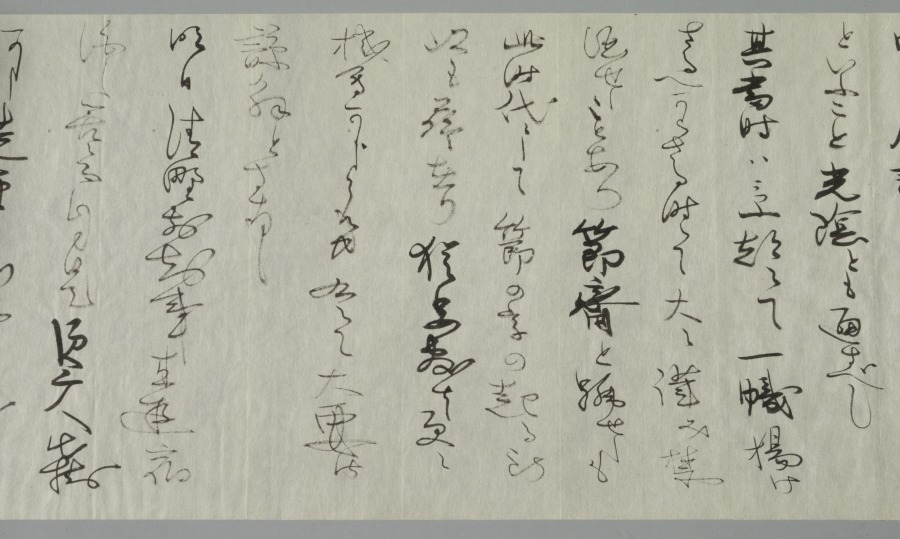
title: Courtesan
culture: Japan, Edo period (1615–1868)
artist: Matsuno Chikanobu (Japanese, active 1716–35)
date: 1716–35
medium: hanging scroll; ink and color on paper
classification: Painting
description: A glamorous courtesan sports an outer robe decorated with large roundels featuring plant motifs including iris and bush clover. Little is known about the life and artistic training of the painter Matsuno Chikanobu, an ukiyo-e artist who painted in a style strongly reminiscent of that of the Kaigetsudō studio. Many of his known paintings are on silk, and executed with high quality pigments, indicating that his primary clientele were wealthy individuals.